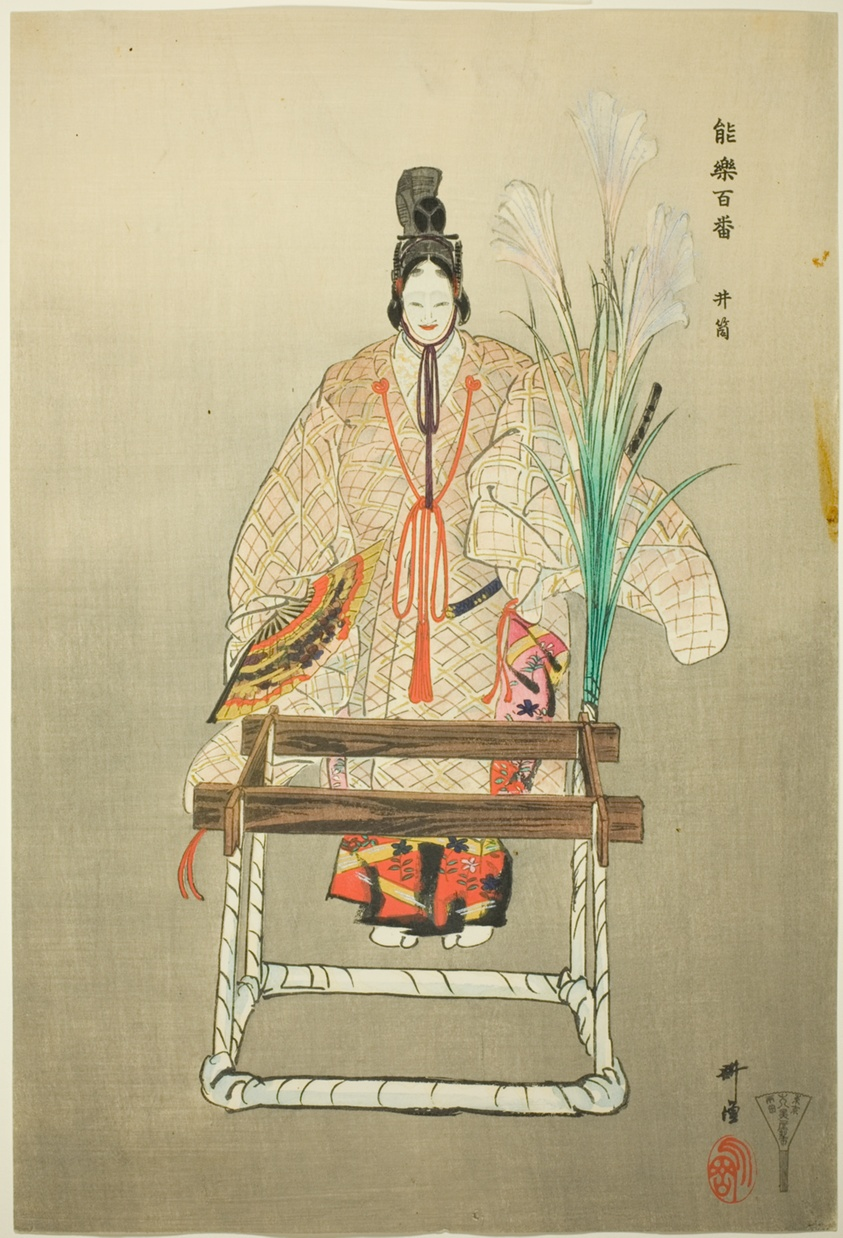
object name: Print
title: Izutsu, from the series "One Hundred No Dramas (Nogaku hyakuban)"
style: Japanese (culture or style)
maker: Tsukioka Kogyo; Japanese, 1869-1927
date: 1898/1903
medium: Color woodblock print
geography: Japan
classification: woodblock print; print; asian art